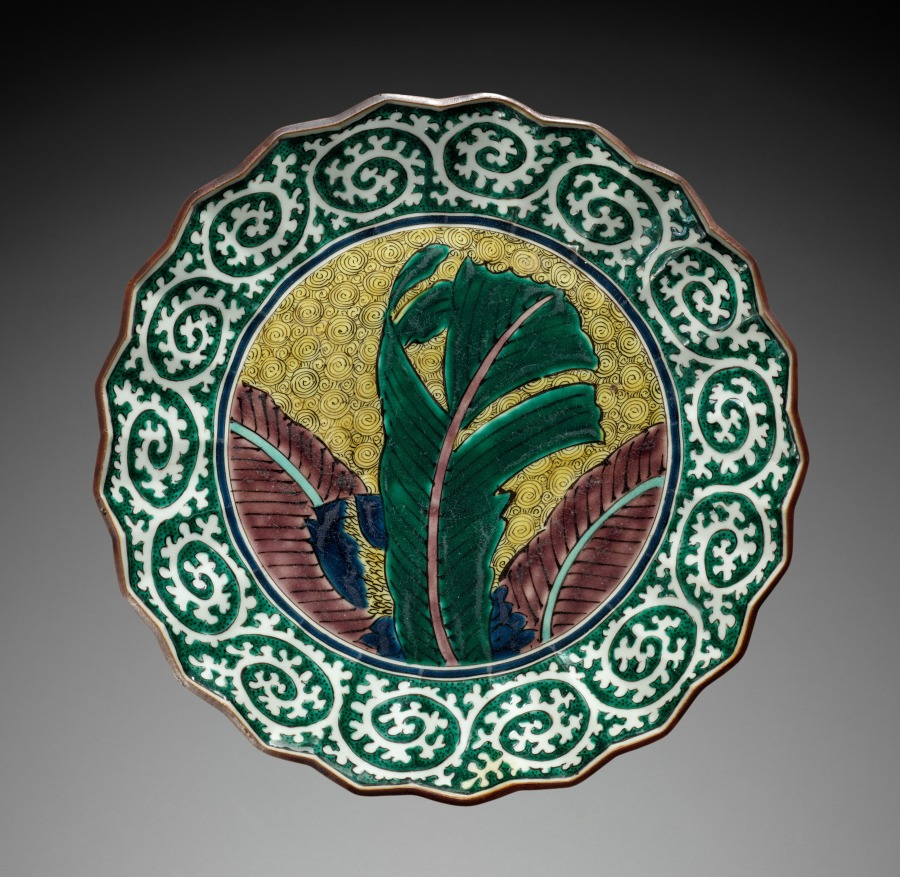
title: Foliate Dish with Banana Leaf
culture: Japan, Edo period (1615–1868)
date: mid-1800s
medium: porcelain with overglaze enamel decoration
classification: Ceramic